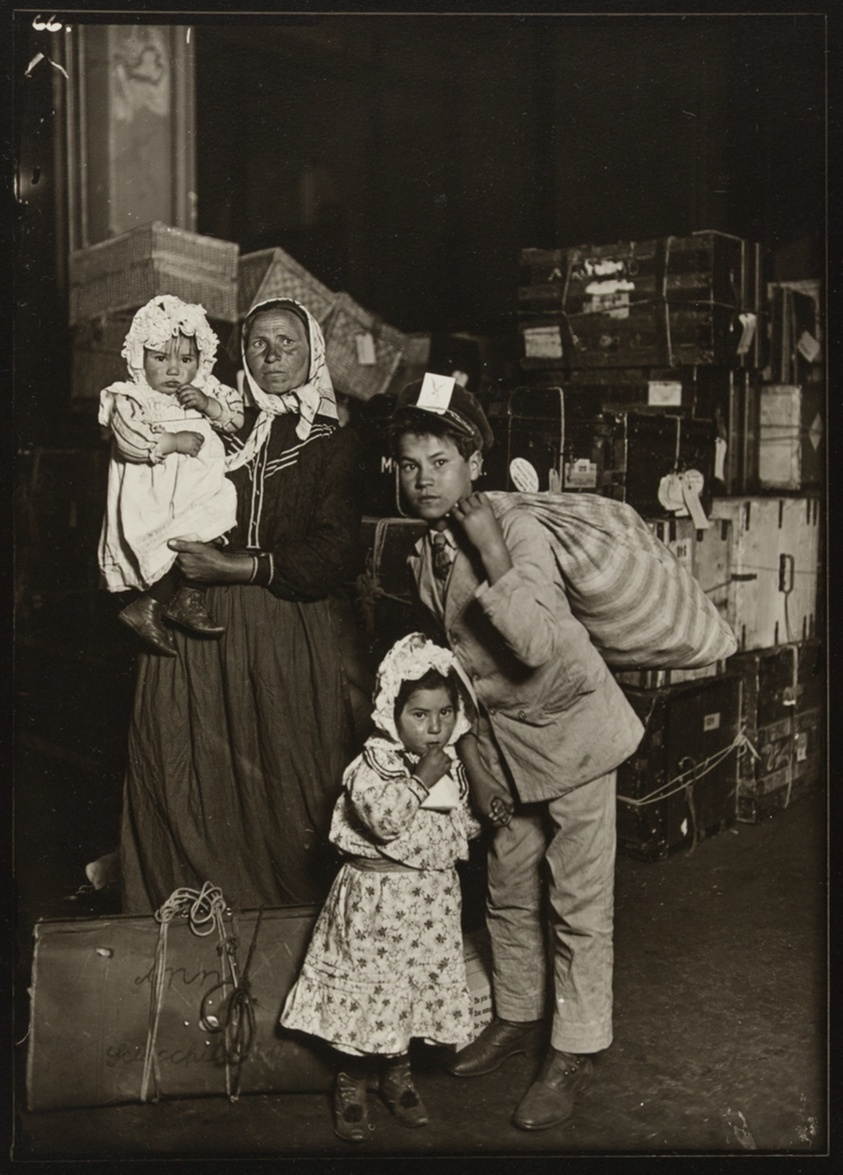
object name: Photograph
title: Italian Family Seeking Lost Baggage, Ellis Island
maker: Lewis Wickes Hine (American, 1874–1940)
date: 1905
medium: Gelatin silver print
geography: United States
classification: gelatin silver (developing-out-paper) pr; photographic process; photography; photograph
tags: Collected by Hugh Edwards, documentary